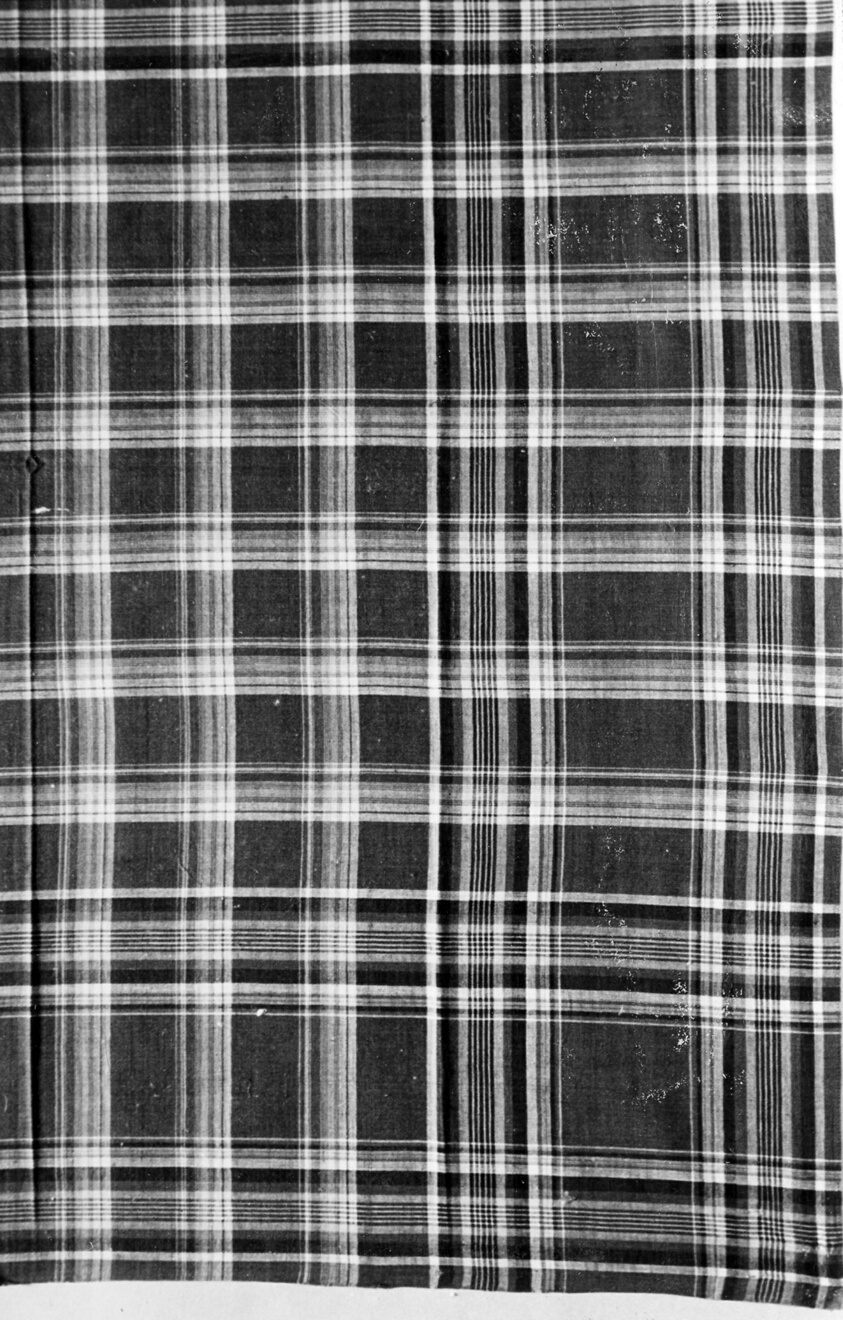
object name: Textile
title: Handkerchief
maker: England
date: 19th century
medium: Cotton, plain weave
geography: England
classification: textile; weaving; accessories (object genre)